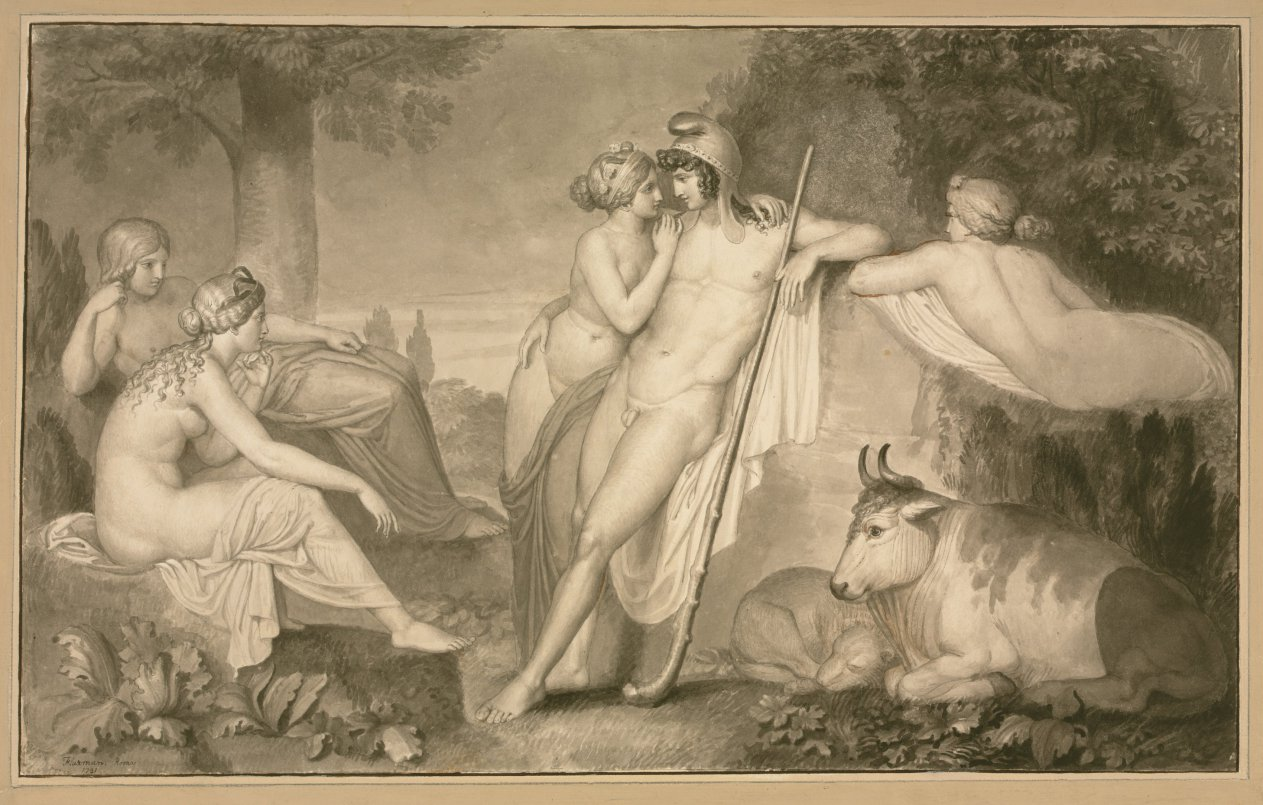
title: Paris and Oenone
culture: England, 18th century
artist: John Flaxman (British, 1755–1826)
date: 1791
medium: brush and gray wash with pen and pale gray-black ink with graphite and brown ink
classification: Drawing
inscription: signed and dated, in black ink, at lower left: Flaxman, Roma / 1791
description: Although he identified himself first and foremost as a sculptor, John Flaxman’s greatest fame and most lasting influence rest with his drawings. Engravings made after his spare designs illustrating classical epics by Homer, Dante, and Hesiod became the most celebrated work in his oeuvre and spread his stylized linearity widely. This highly finished, signed and dated drawing was made while Flaxman was in Rome and needed to supplement his income while trying to obtain commissions for sculpture. Flaxman chose an obscure classical subject: the famous Trojan shepherd, Paris, with his first love, the nymph Oenone. The scene takes place on Mount Ida, in an idyllic time of peace before Paris was called upon to judge the beauty of the goddesses Hera, Athena, and Aphrodite, thus instigating the Trojan War.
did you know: John Flaxman called his drawings "outlines," referring to their sparse style.